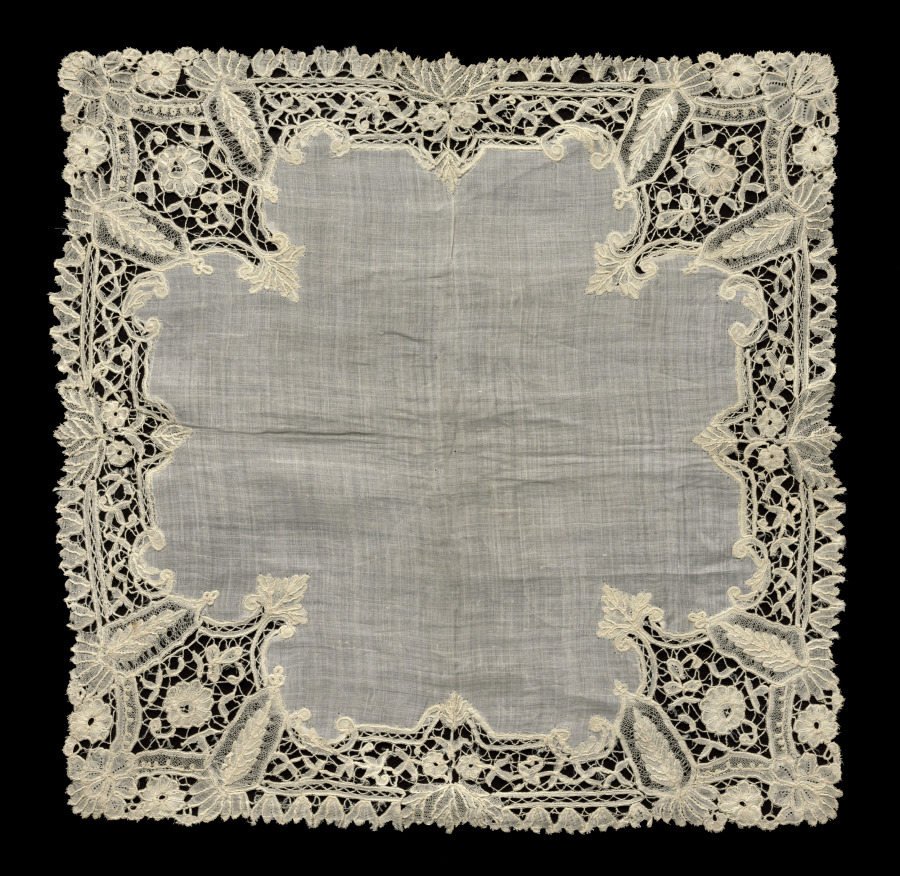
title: Lace Handkerchief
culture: Belgium (Flanders)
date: 1800s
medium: Bobbin lace (Duchesse lace)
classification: Lace